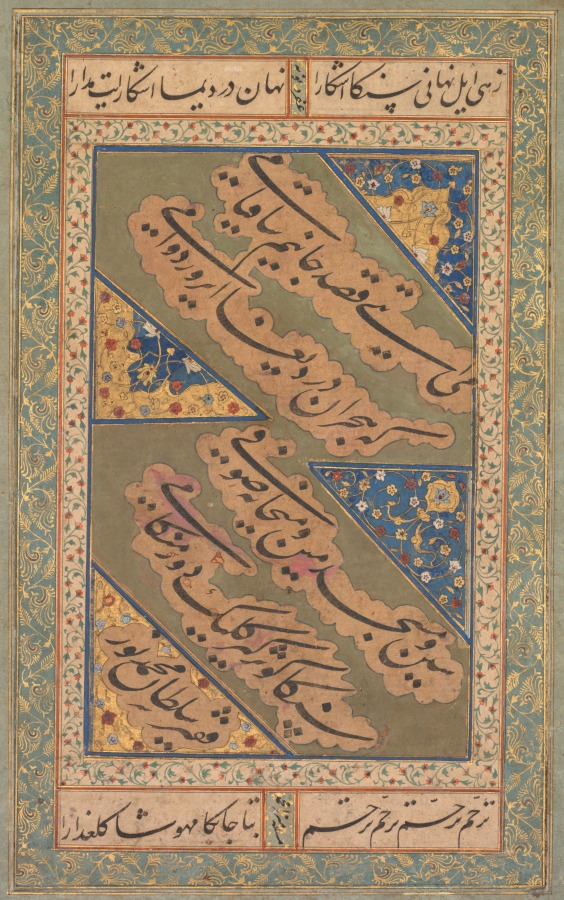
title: Calligraphy of Chaghatai Turkish Poems in Praise of Wine (verso)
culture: Mughal India, court of Akbar (reigned 1556–1605)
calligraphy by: Mirza Muhammad (probably Persian, active c. 1520s)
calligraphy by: and Sultan Muhammad Nur (Persian, c. 1472–1536)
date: c. 1500–1520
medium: Gum tempera, ink, and gold on paper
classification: Painting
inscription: Persian inscription in central small rectangular panel below, in nasta‘liq script: Copied by Mirza Muhammad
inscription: Chaghatai quatrain in center, in nasta‘liq script: The wine has made an attempt on my life,/ Since it is the wine that can wear down the pain of separation./ O Sufi! Let the mosque be for you, and the tavern for me,/ Since you need to arrive at the Spring of Kowsar, while I am in need of wine!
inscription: Persian signature in lower left triangular panel: The humble Sultan Muhammad Nur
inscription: Chaghatai verses in margins, in nasta‘liq script: Since many obscurities have become clear to you,/ So make it clear that you can put up with my secret pain./ Compassion is the cure for my wounds/ O beloved! O darling! O beauty!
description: This page of delicately illuminated calligraphy from the pre-Mughal period was mounted into a Mughal album. The poems are written in the native language of the Mughals, a form of Turkish called Chaghatai, using a flowing form of Arabic script called nasta‘liq. The Mughals self-consciously adopted Persian as their official court language, so few Chaghatai books or works of calligraphy were made for them. The quatrain in the center reads: The wine has made an attempt on my life, Since it is the wine that can wear down the pain of separation. O Sufi! Let the mosque be for you, and the tavern for me, Since you need to arrive at the Spring of Kowsar, while I am in need of wine! The Spring of Kowsar is where the righteous quench their thirst in the afterlife.